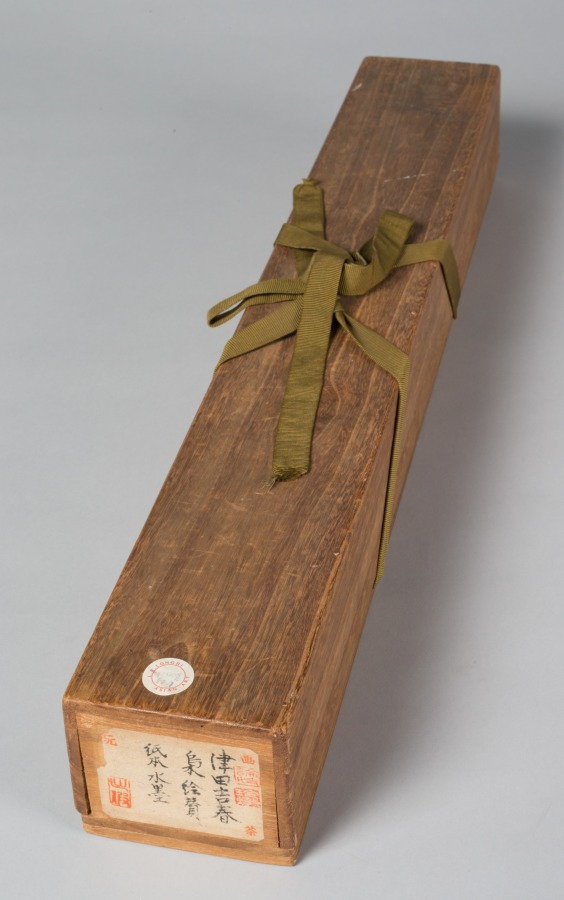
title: Owl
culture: Japan, Edo period (1615–1868)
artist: Tsuda Bensaku (Japanese, active 1620s–40s)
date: 1630s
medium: hanging scroll; ink and slight color on paper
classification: Painting